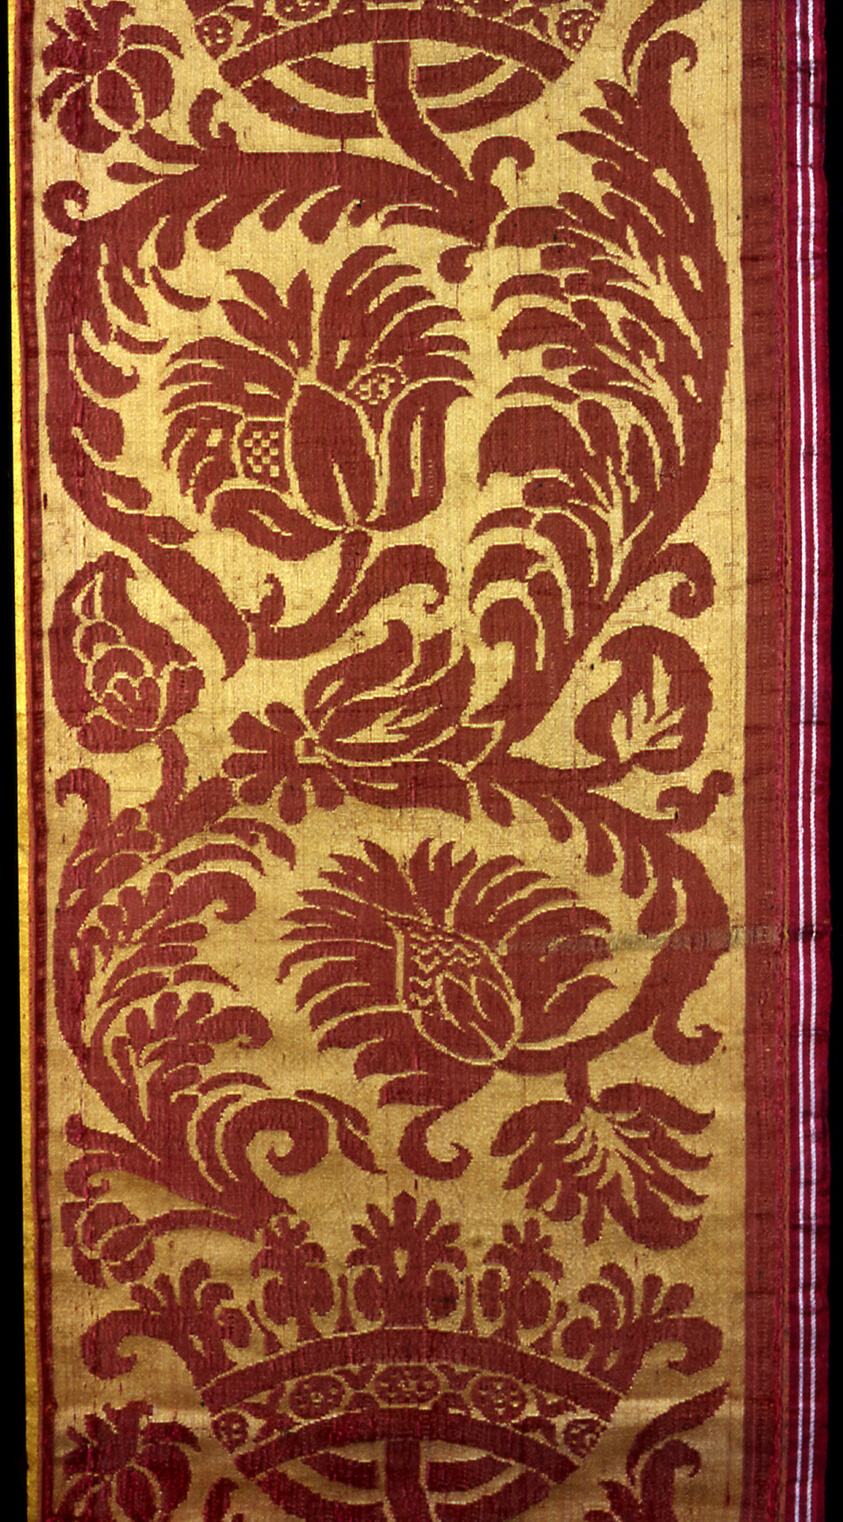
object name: Textile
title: Border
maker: Italy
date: 1601/25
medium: Silk, satin weave self-patterned by reversing of faces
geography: Italy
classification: textile; weaving